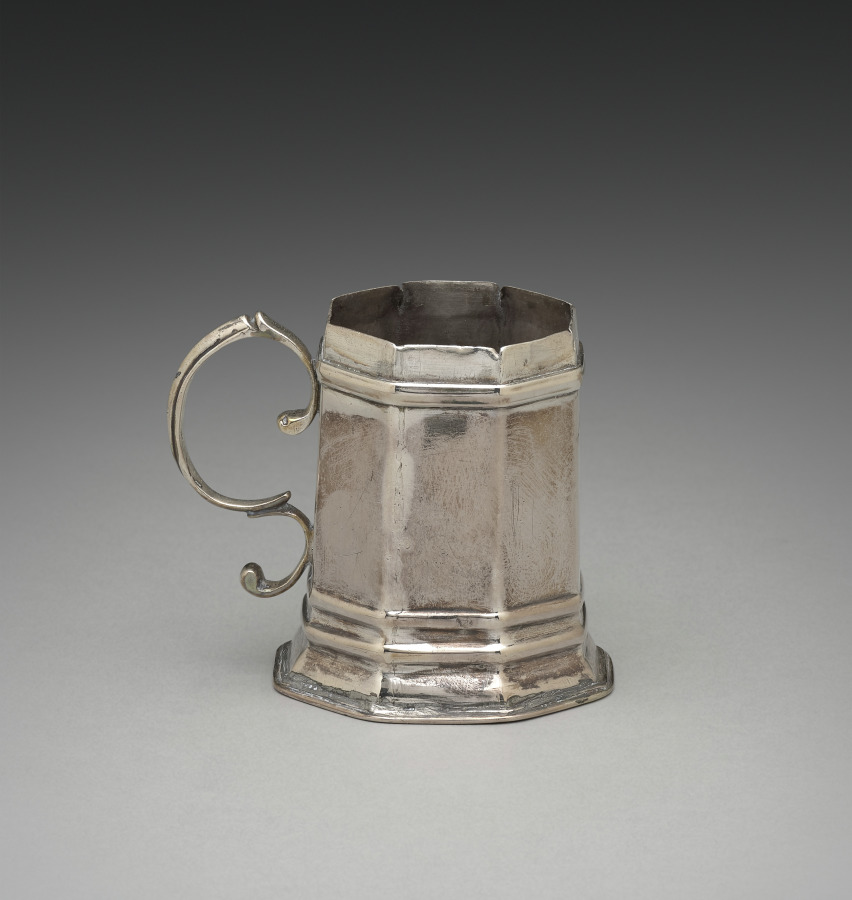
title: Caster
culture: America, Massachusetts, Boston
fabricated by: Andrew Tyler (American, 1692–1741)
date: c. 1720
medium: silver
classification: Silver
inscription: engraved: "M" over "D * L" in shaded block letters on bottom, and "AM" in block letters on front, opposite handle.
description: A caster was used to spread a finely ground substance, probably pepper.